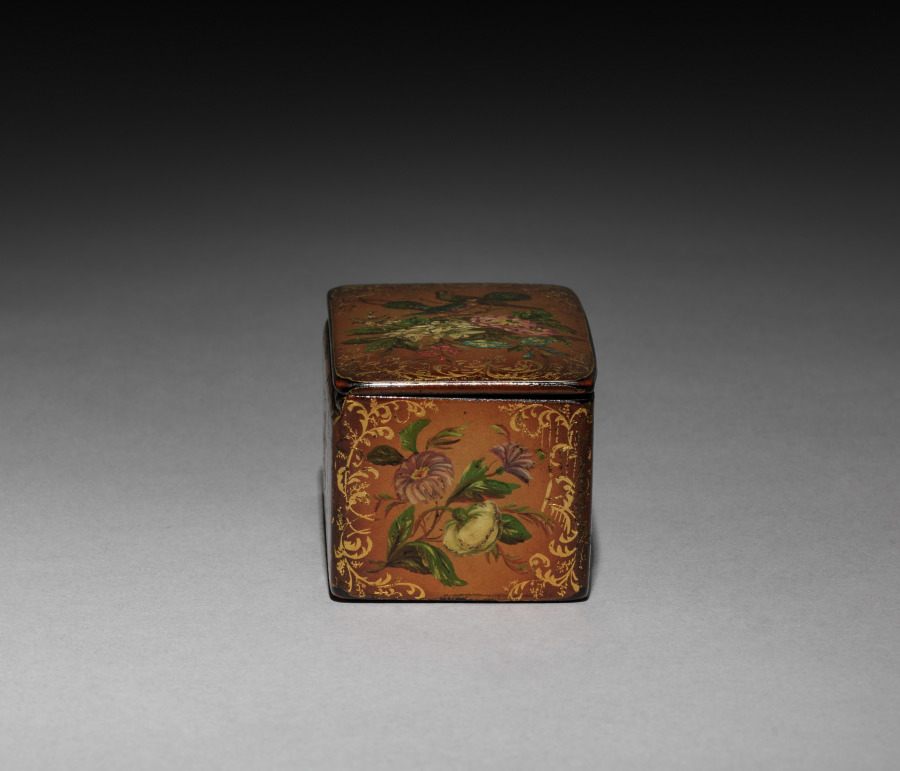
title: Box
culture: Russia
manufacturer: Lukutin Factory (Russian, 1818–1904)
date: 1830–81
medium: lacquered wood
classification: Miscellaneous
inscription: inscription on interior.